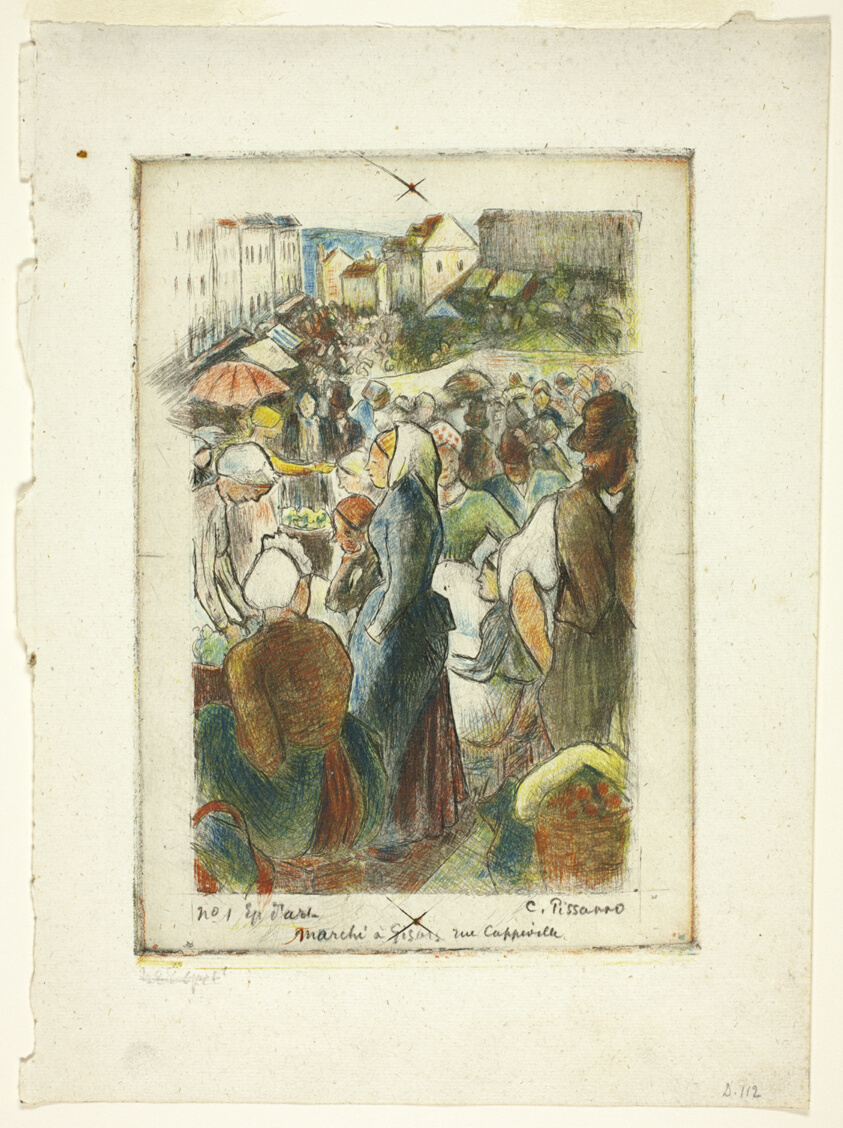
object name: Print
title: The Market at Gisors; Rue Cappeville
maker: Camille Pissarro (French, 1830-1903)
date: c. 1894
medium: Color etching on ivory laid China paper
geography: France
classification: etching; print; prints and drawing